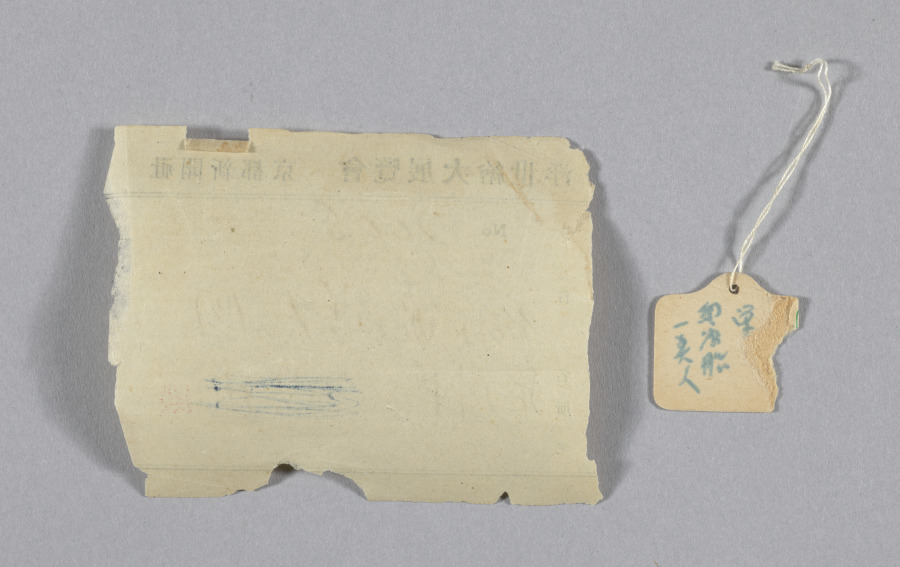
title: Beauty in a Boat on Sumida River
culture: Japan, Edo period (1615–1868)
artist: Chōbunsai Eishi (Japanese, 1756–1829)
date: c. 1801–4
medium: hanging scroll; ink and color on silk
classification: Painting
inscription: artist's signature 栄之筆 and seal, lower right.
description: The Sumida River was a popular refuge from the heat and humidity of the city during the summer. One can see the torii gate of Mimeguri Shrine just to the left of the woman's fan.